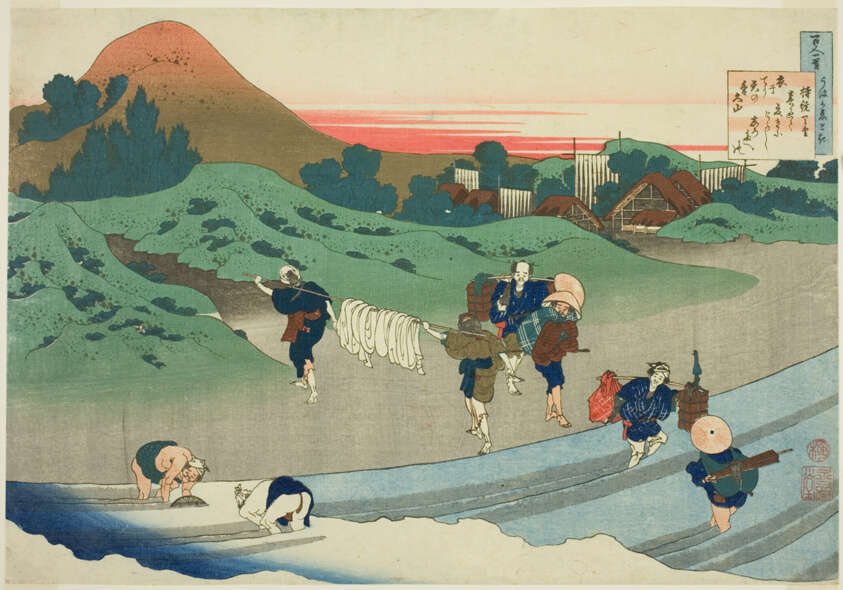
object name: Print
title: Empress Jito (Jito Tenno) from the series "One Hundred Poems as Explained by the Wet Nurse (Hyakunin isshu uba ga etoki)"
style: Japanese (culture or style)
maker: Katsushika Hokusai 葛飾 北斎; Japanese, 1760-1849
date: c. 1835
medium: Color woodblock print; oban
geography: Japan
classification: woodblock print; print; asian art